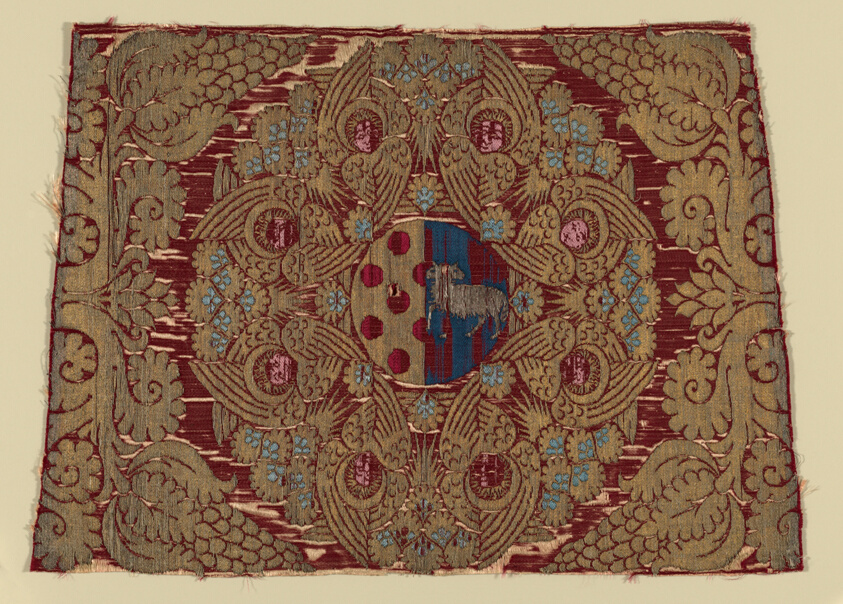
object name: Textile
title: Fragment (From a Vestment)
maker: Italy, Florence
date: 15th century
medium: Silk, gilt-animal-substrate-wrapped linen, and gilt-metal-strip-wrapped silk, warp-float faced 4:1 satin weave with supplementary brocading wefts and patterning wefts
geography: Florence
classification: textile; weaving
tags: coat of arms